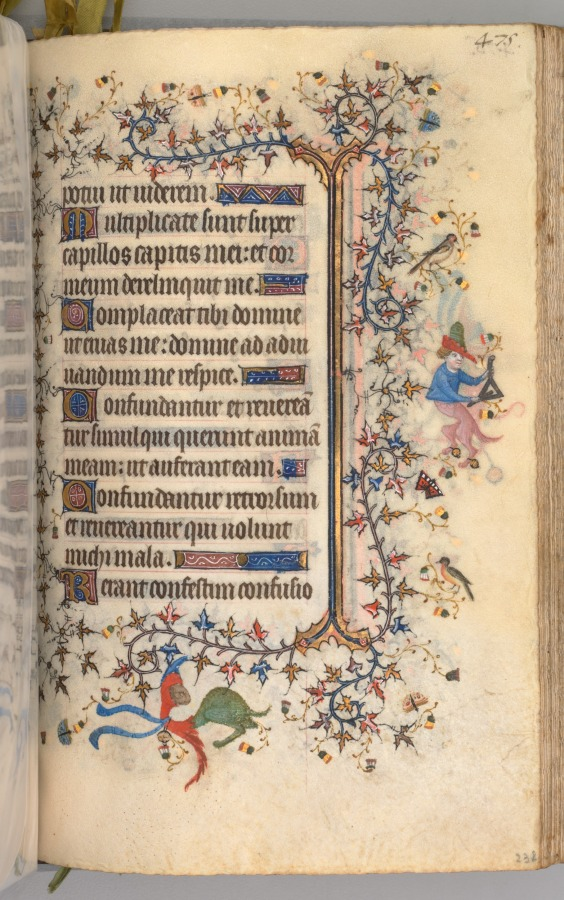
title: Hours of Charles the Noble, King of Navarre (1361-1425): fol. 232r, Text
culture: France, Paris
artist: Master of the Brussels Initials and Associates (French)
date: c. 1405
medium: ink, tempera, and gold on vellum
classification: Bound Volume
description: This precious volume was obviously highly prized by its owner, the French-born King of Navarre, who had his coat of arms painted on no less than twenty folios. Rather than directly commissioning this manuscript from a specific workshop, it seems that Charles the Noble acquired his book of hours -- perhaps ready-made for the luxury market -- while on a trip to Paris in 1404-05. A collaborative effort, six painting styles are evidenced within the pages of this codex, those of two Italians, two Frenchmen, and two Netherlanders. The painter who was responsible for the planning and decoration of the book, and who produced seventeen of the large miniatures, was a Bolognese artist known as the Master of the Brussels Initials. His principal assistant, responsible for most of the borders, was a Florentine who signed his name "Zecho" da Firenze on folio 208 verso.